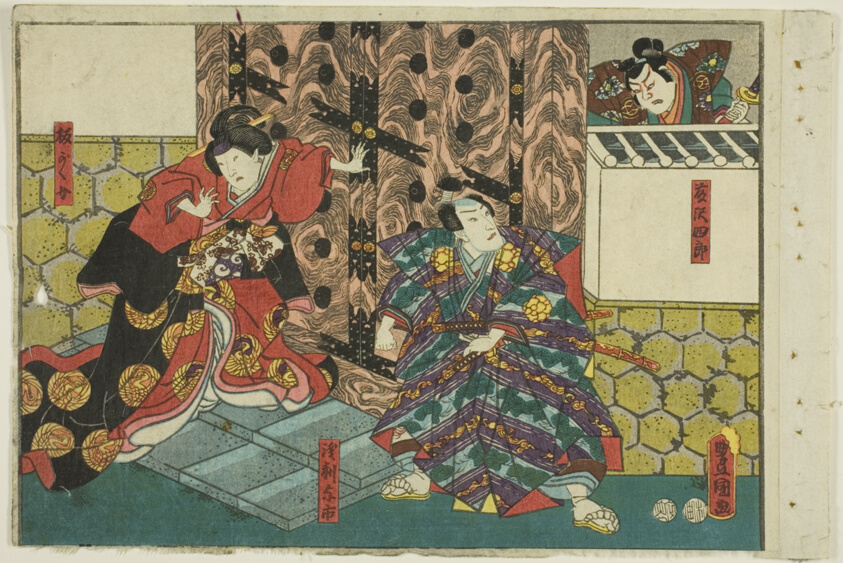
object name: Print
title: Actors as Fujisawa Shiro, Asari Yoichi, and Hangaku, from an untitled series of half-block images of kabuki scenes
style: Japanese (culture or style)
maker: Utagawa Kunisada I (Toyokuni III) (Japanese, 1786-1864)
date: c. 1851/52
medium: Color woodblock print; chuban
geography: Japan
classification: woodblock print; print; asian art